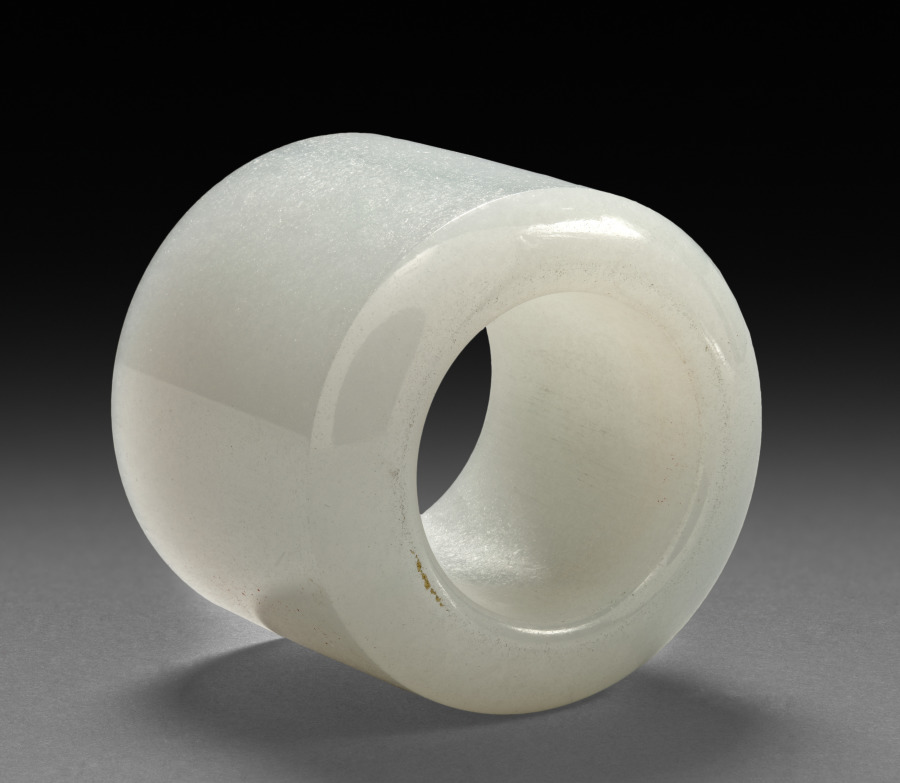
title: Thumb Ring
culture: China, Qing dynasty (1644-1911) or Republican period (1912-49)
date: 1800s–1900s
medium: white jade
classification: Jewelry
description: Jade rings were worn by men on the thumb of the right hand to assist with holding and pulling the string of the archer’s bow. However, thumb rings were also fashionable accessories for civil officials in the late Qing dynasty.